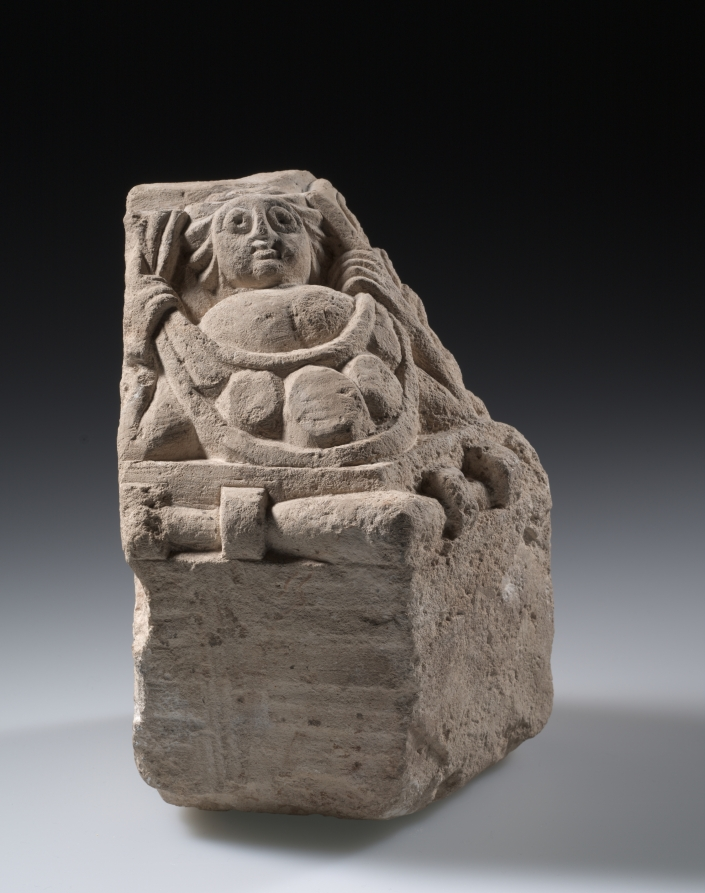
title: Cornerstone or Corbel (?)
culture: Egypt, Coptic period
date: 400s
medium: limestone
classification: Sculpture